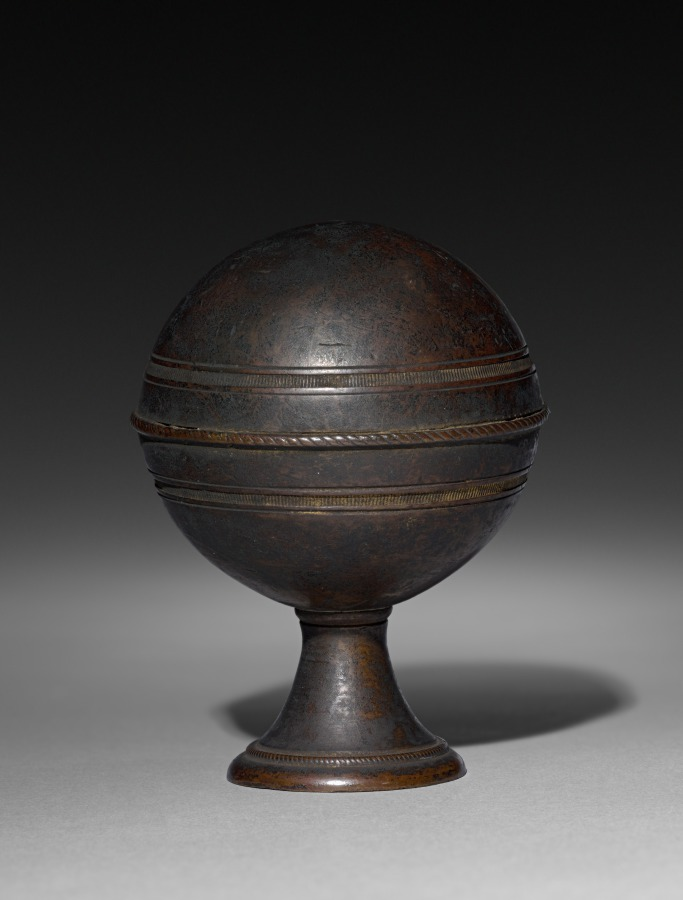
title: Ornamental Finial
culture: France, early 19th century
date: early 1800s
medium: bronze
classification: Metalwork